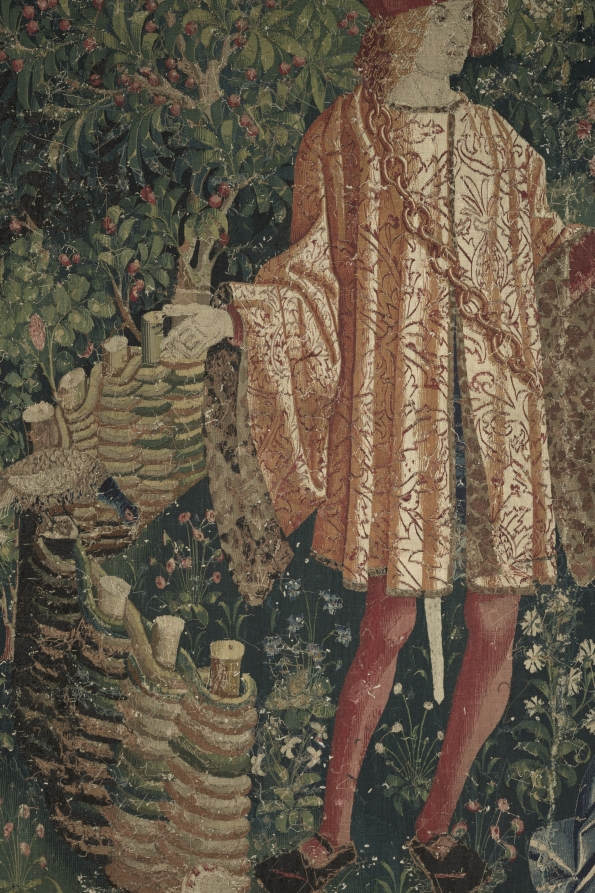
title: Time (from Chateau de Chaumont set)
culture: France, Lyon(?), early 16th century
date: 1512–15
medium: silk and wool; tapestry weave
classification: Tapestry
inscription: French verse in Gothic letters translates as follows: "One sees the weather adorned in green, Sometimes as pleasing as an angel; To suddenly change and be quite strange, The weather never stays the same."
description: Pierre Sala, who likely commissioned the set, is portrayed as the richly attired central figure offering a bouquet, a symbol of knowledge, to Éléonore, his daughter. Éléonore is pregnant, revealed by her upturned skirt and the persimmon in her husband Hector’s hand. Hector’s mother, Marguerite, in dark attire, will wed the widowed Sala in 1519. They appear in front of the royal chateau of Blois. The figures at the right convey Sala’s advice to his children. Time (the old man with the staff) with Clio, the Muse of History, standing on his shoulders, is being attacked by a Herculean youth wielding a stick. With this allegory, Sala is explaining that youth is ignorant of the complexities of life and time. The small unicorn at the far right represents the soul. The verse in Old French at the top refers to changing time: One sees Time adorned with green foliage, Sometimes as pleasant as an angel, Then suddenly change and become quite strange. Never does Time persist in one state.